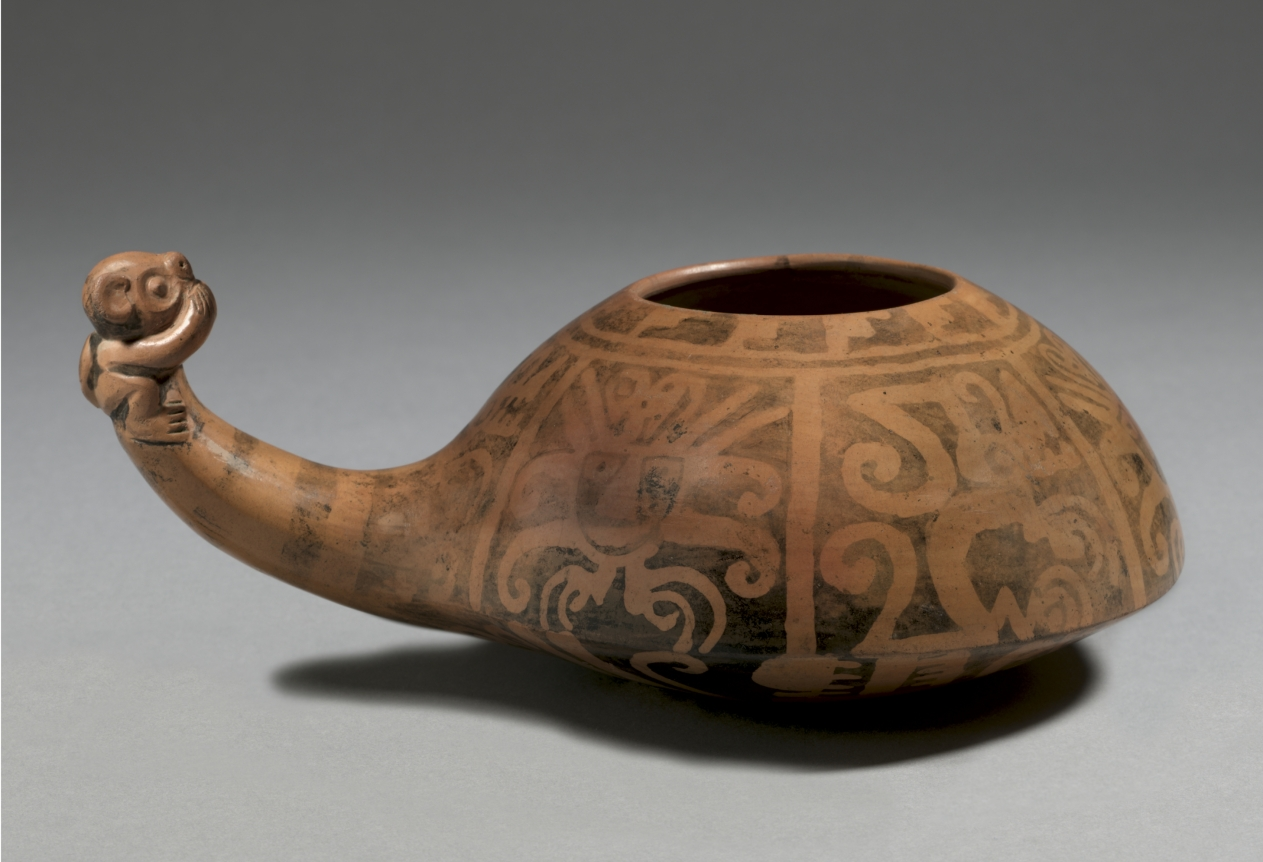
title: Dipper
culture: Peru, North Highlands, Recuay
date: 100 BCE–700 CE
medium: ceramic, slip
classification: Ceramic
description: Both of these objects feature a creature known as the "Recuay feline," although it could also refer to a fox, dog, or viscacha (a rodent). Whatever its identity, the prominent crest on its head ties it to the supernatural realm, a connection underlined by the deity head that also appears on the dipper and by the ritual function of snuff tablets, which were used to inhale hallucinogenic snuffs during religious ceremonies.